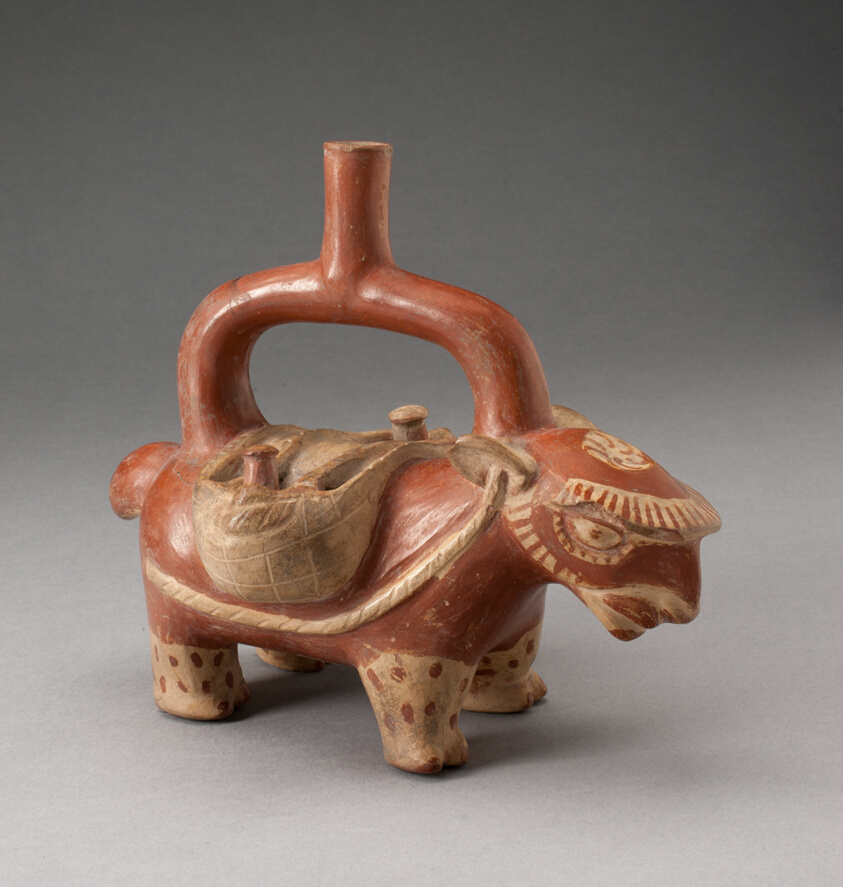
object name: Vessel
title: Stirrup Spout Vessel in Form of a Pack Llama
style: moche, mochica, early intermediate period, Pre-Columbian, americas, Arts of the Americas, andean, andes, south american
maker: Moche (North coast, Peru)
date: 100 BCE–500 CE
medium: Ceramic and pigment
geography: Peruvian North Coast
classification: earthenware; art of the americas; ceramics; vessel